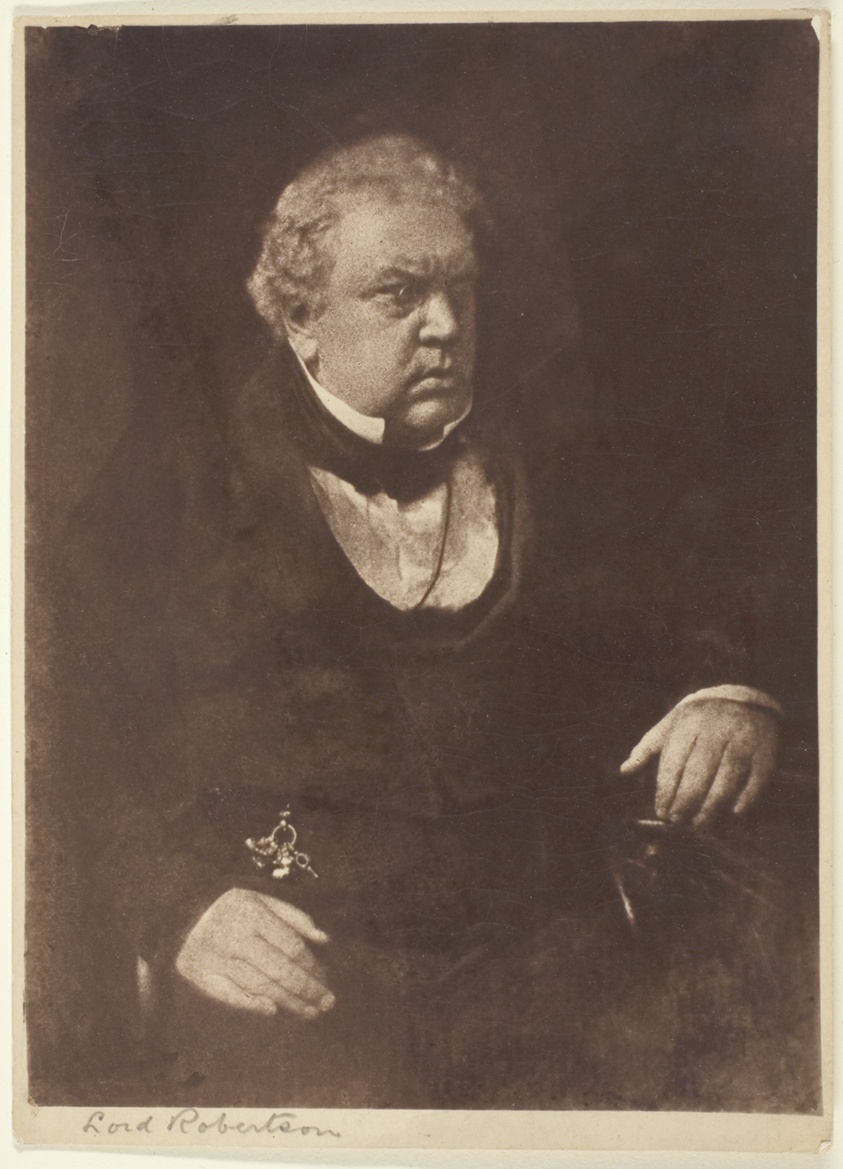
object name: Photograph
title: Lord Robertson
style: 19th century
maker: David Octavius Hill (Scottish, 1802–1870) and; Robert Adamson (Scottish, 1821–1848)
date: 1843/46, printed 1890/1900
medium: Carbon print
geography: Scotland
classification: carbon print; pigment process; photographic process; photography; photograph